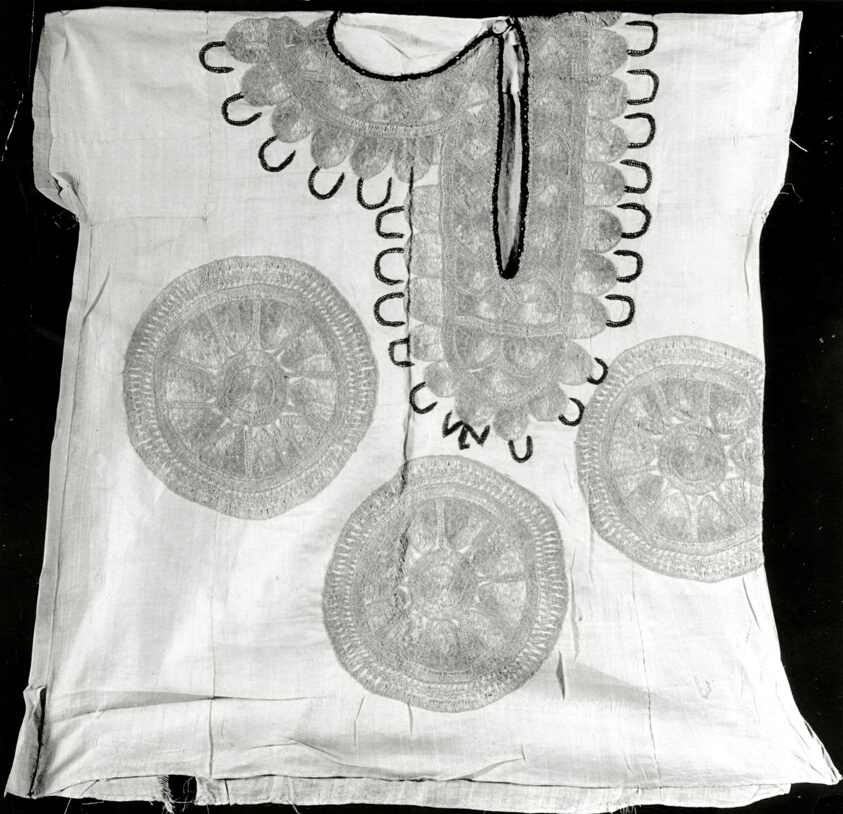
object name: Costume and Accessories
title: Child's Tunic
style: Indian (South Asian), bamana, mande, african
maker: India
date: 19th century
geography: India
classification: textile; needlework (visual works); costume; dress (garment); clothing